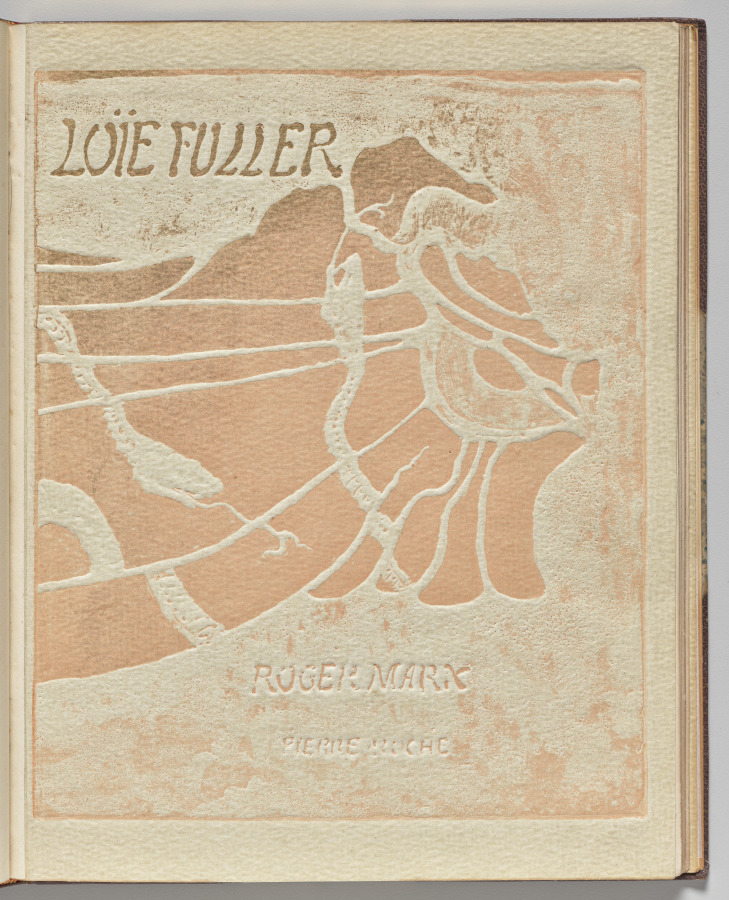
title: Frontispiece/ Title Page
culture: France, early 20th Century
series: La Loïe Fuller, by Roger Marx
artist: Pierre Roche (French, 1855–1922)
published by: Les Cents Bibliophiles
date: 1904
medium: gypsograph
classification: Bound Volume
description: Although best known as a sculptor, Roche was a versatile and prolific artist who worked in many mediums. Loïe Fuller, the pioneer of modern dance who took Paris by storm in 1892, was one of his favorite subjects. He portrayed her in clay, bronze, marble, plaster, and in a series of gypsographs that illustrated an essay by the art critic Roger Marx. The book was described as "a precious monument to Loïe Fuller."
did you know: Roger Marx, the author of the essay contained in this book, was among the most prominent critics, curators, and collectors of late 19th-century Paris.